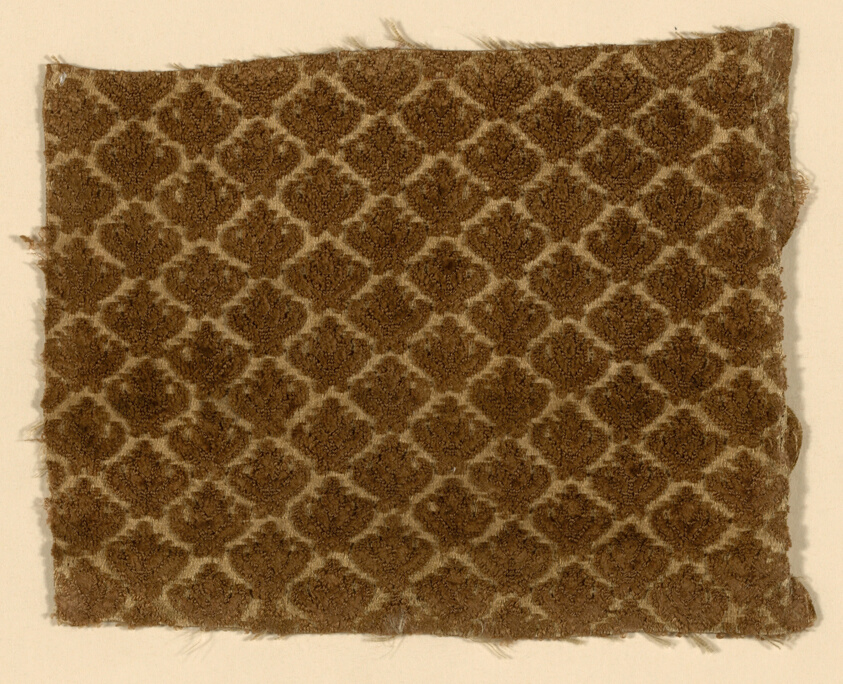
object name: Textile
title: Fragment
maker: Italy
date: 1650/1700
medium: Cisele voided satin velvet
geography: Italy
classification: textile; weaving - velvet